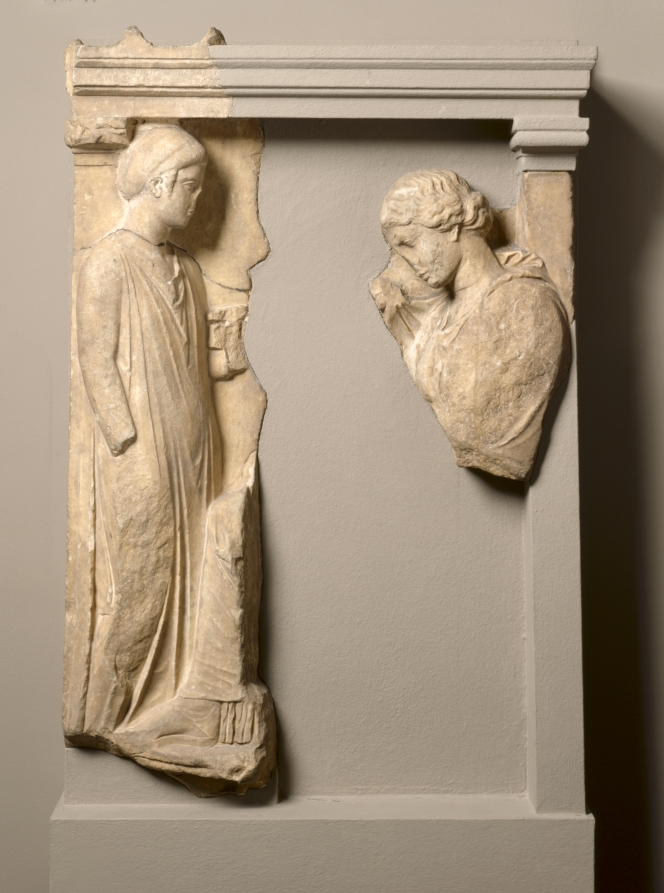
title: Grave Stele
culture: Greece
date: 400–350 BCE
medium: pentelic marble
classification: Sculpture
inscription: ...ΜΕΓΑΛΗΝ ΛΥΠΗΝ ΣΥ ΛΙΠΟΣΑ ΦΑΝ... ...ΔΕ ΣΕΠΩΙΚΤΙΣΕ ΜΟΙΡΑ ΠΟΘΕΙ...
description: Carved in high relief, the original composition of this Attic grave marker can be reconstructed by comparison with more complete examples elsewhere (such as the Stele of Hegeso in Athens [National Archaeological Museum, 3624]). The standing figure at left likely represents a maid or servant, her hair mostly contained within a sakkos (haircloth). Holding a pyxis (small container) in her left hand, she approaches the more fragmentary seated figure at right. This woman, draped and casting her eyes downward, represents the deceased, perhaps Phanostrate, as one scholar has restored the partial name Phan... inscribed in the fragmentary epigram on the preserved portion of the lintel.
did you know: The fragmentary seated woman at right represents the deceased.